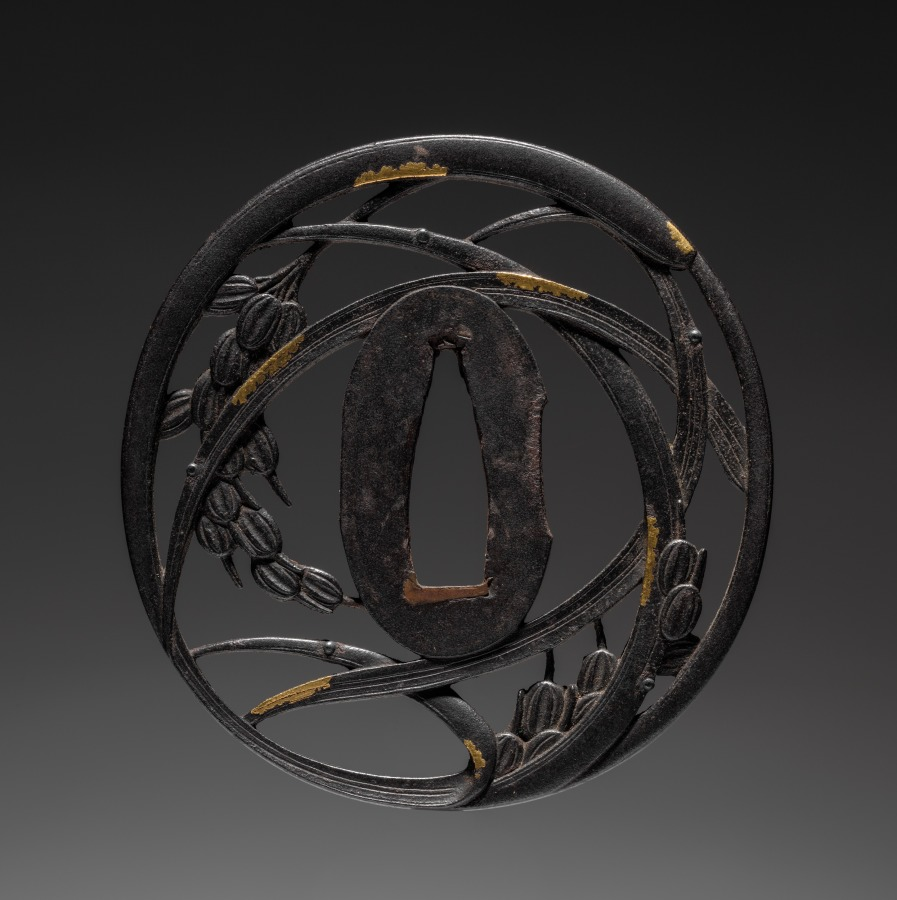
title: Sword Guard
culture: Japan, Edo period (1615–1868)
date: early 1800s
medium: iron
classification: Arms and Armor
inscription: Signature: Yuchikudo Seisen with seal